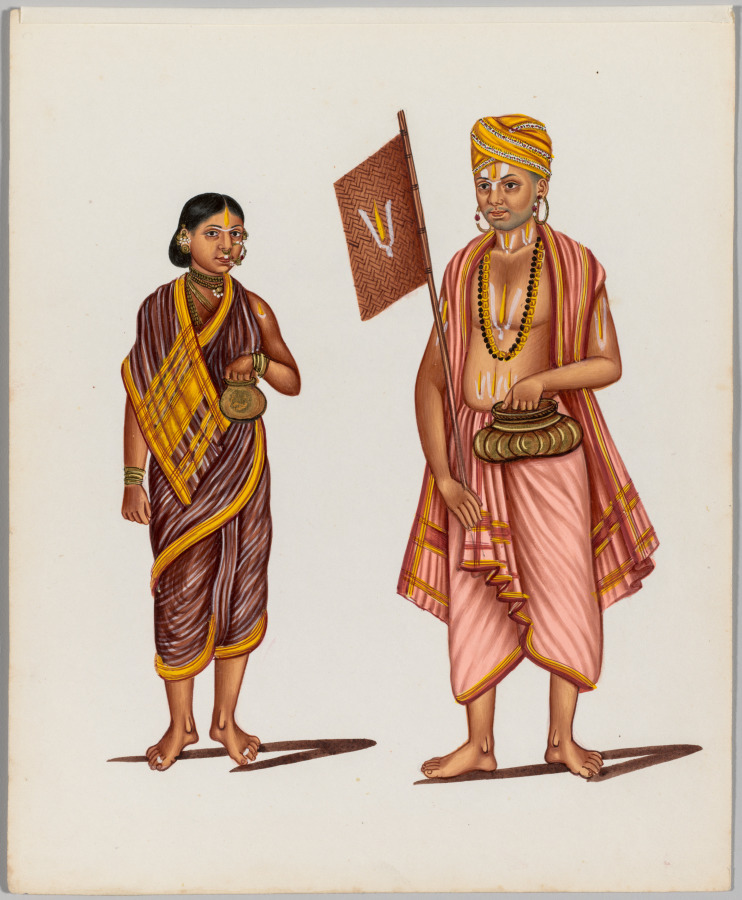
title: A Couple (from the series Costumes and Professions)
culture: South India, Tanjore, 19th century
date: mid-1800s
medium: Gum tempera, ink, and gold on paper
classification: Painting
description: This work was made by Indian artists for a member of the British East India Company. It was painted in the southern style of Company school painting, which is distinguished by its bold outlines, saturated color, and heavy application of gold. The priest on the right bears the sectarian markings of a follower of the Hindu god Vishnu on his forehead, chest, arms, and flag. A 19th-century British inscription on its surviving fly sheet, a protective cover of tissue paper, states that this priest made his living by praying to the “native doorway” early every morning. The survival of this commentary reveals how British collectors used these apparently objective depictions of costumes and professions to implicate Indian holy men in strange or even charlatan behavior.